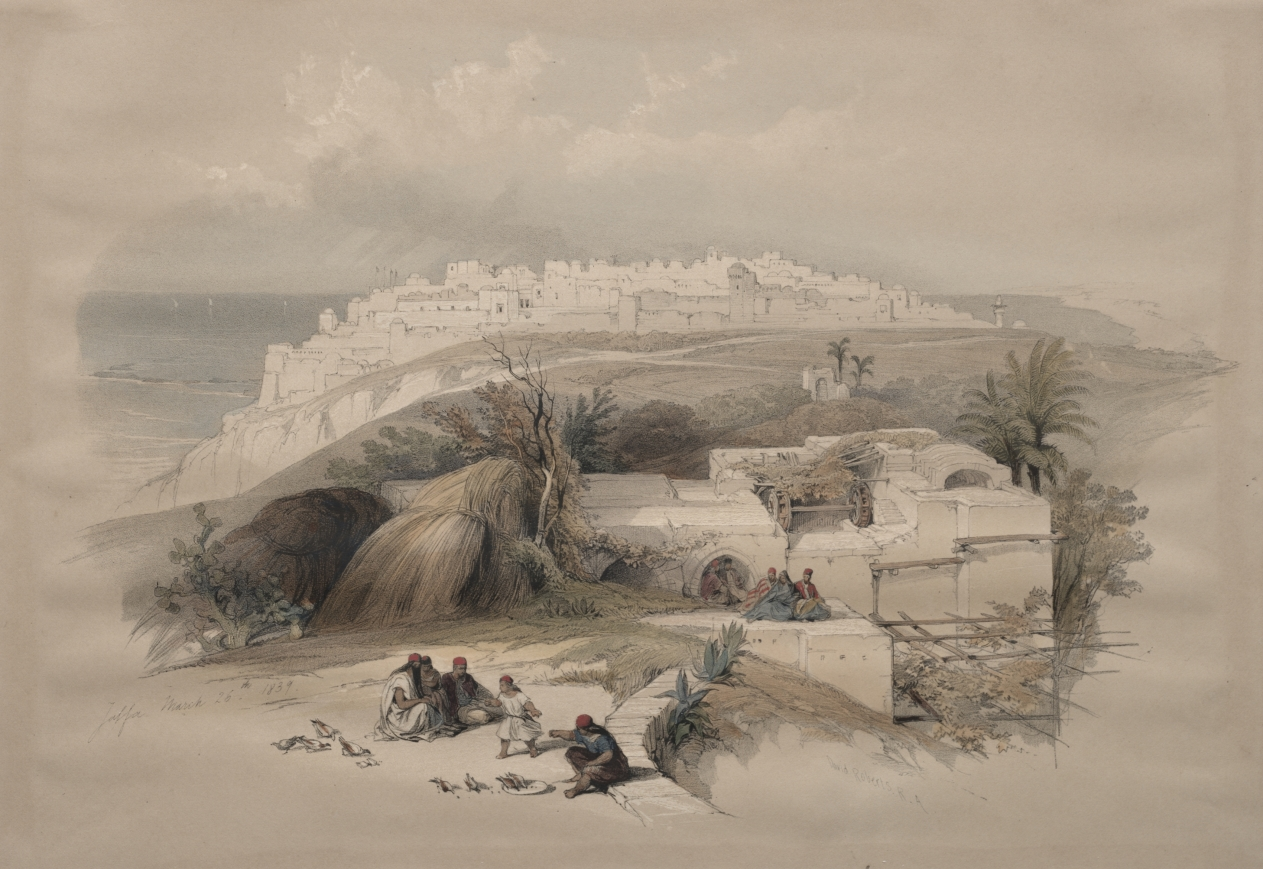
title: Jaffa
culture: England, 19th century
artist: David Roberts (Scottish, 1796–1864)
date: 1839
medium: color lithograph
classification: Print